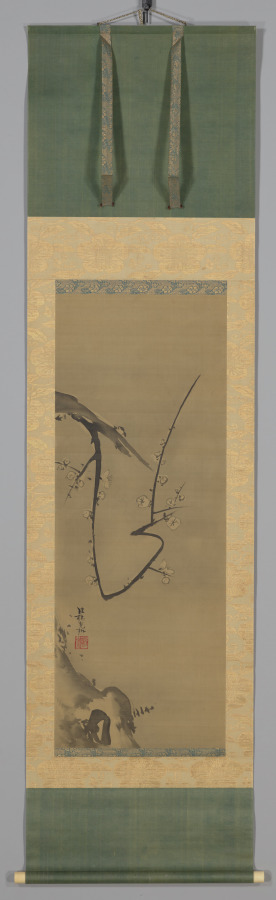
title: Plum Tree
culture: Japan, Edo period (1615–1868)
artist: Ogata Kōrin (Japanese, 1658–1716)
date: c. 1700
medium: hanging scroll; ink on silk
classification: Painting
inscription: Artist's signature and seal above hillock bottom right corner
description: Ogata Kōrin had to think through his design carefully to create these white plum blossoms and deliver their effect, as he used the reserve technique—where selected areas of the painting surface are left unpainted—to achieve it. He probably roughed in the tree before applying an ink wash to the entire silk surface, except where he intended to place the flowers. He likely then returned to articulate the petals and, in some cases, the pistils and stamens. The composition shows the tree twisting out of view, only to return with a branch of new growth jabbing forth from an old, broken limb, thereby heightening the visual impact of the blossoms.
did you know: The Rinpa style of painting is named for Ogata Kōrin, even though he did not create it.